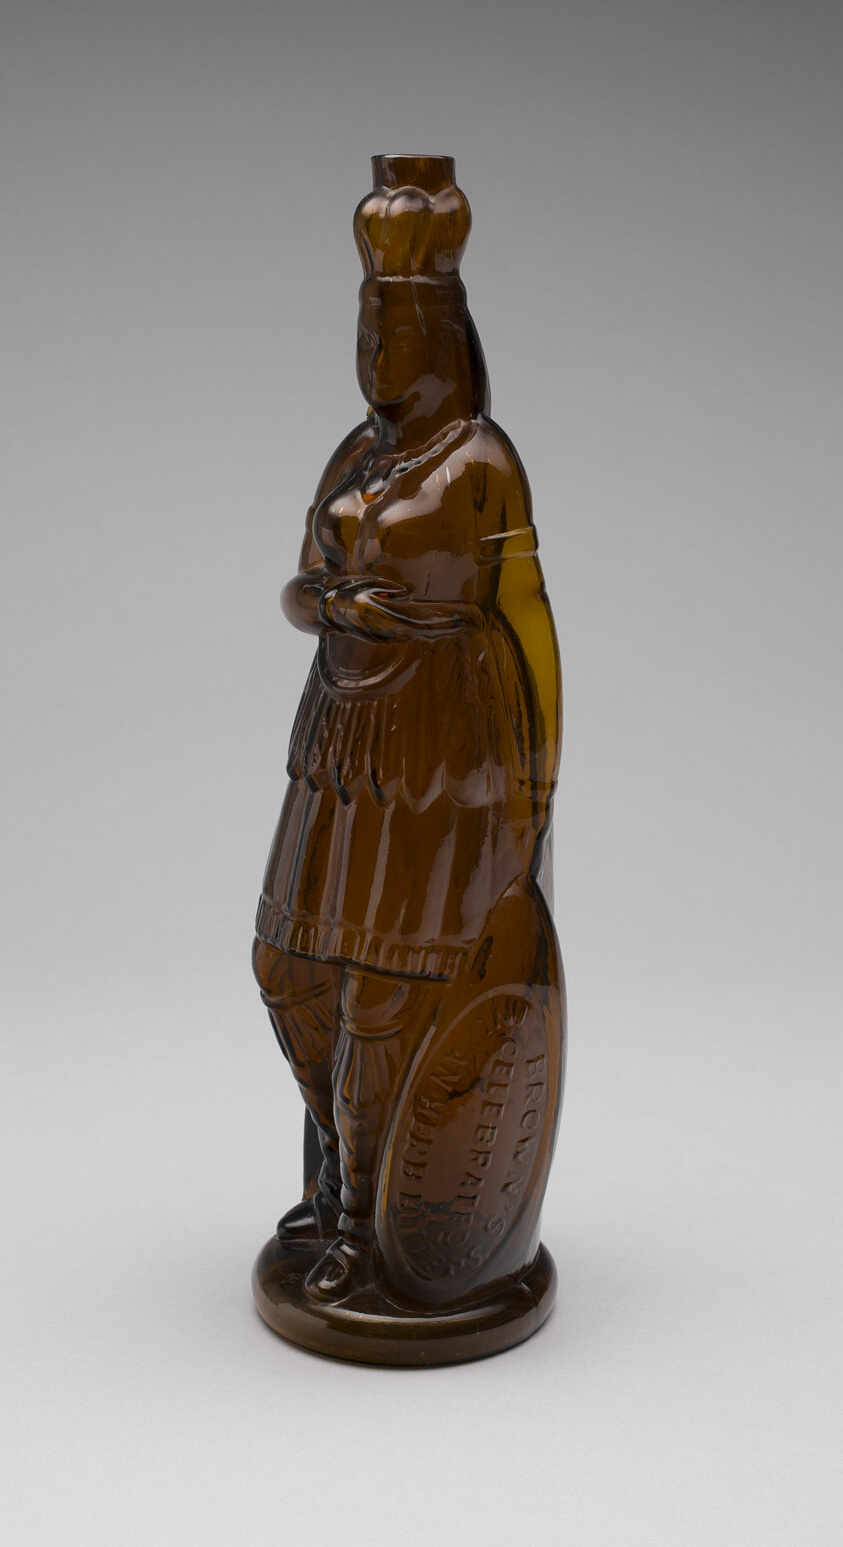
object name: Glass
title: Bottle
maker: Possibly Whitney Brothers Glass Works; American, c. 1838–1920; Glassboro, New Jersey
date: 1867–75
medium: Glass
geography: Glassboro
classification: bottle; glass; american decorative arts; american arts; decorative arts